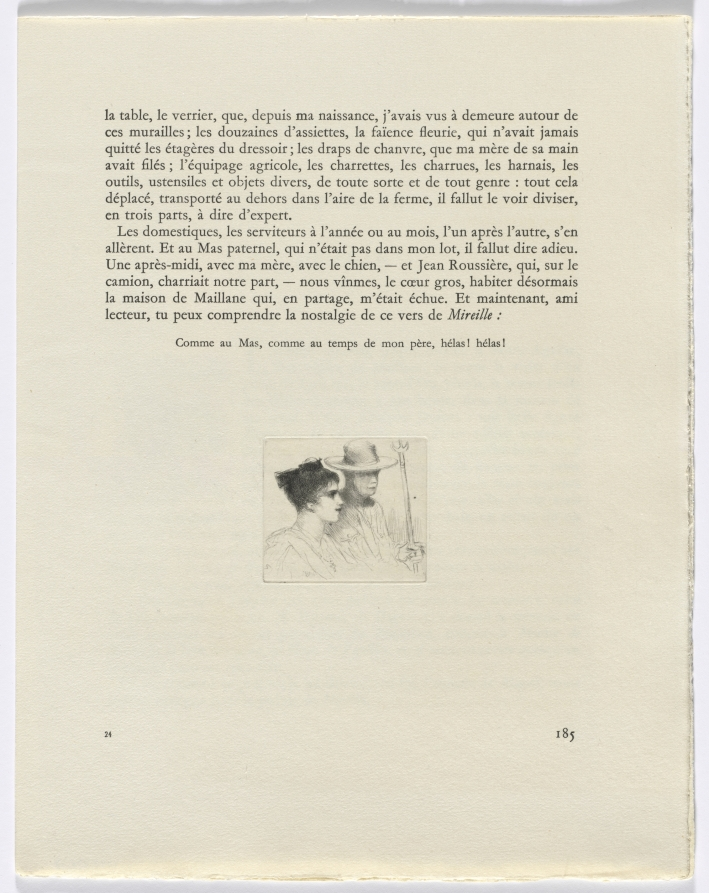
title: Frédéric Mistral: Mémoires et Recits by Frédéric Mistral: bust of a man and a woman (page 185)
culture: France, 20th century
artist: Auguste Brouet (French, 1872–1941)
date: 1937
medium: etchings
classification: Portfolio